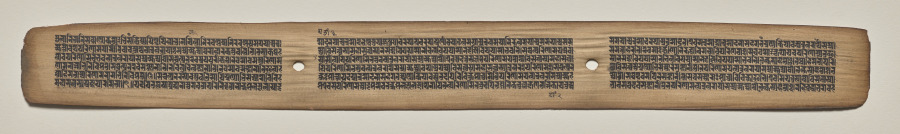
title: Text, folio 53 (recto), from a Manuscript of the Perfection of Wisdom in Eight Thousand Lines (Ashtasahasrika Prajnaparamita-sutra)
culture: Eastern India, Bihar, Vikramashila Monastery. Painting: Nepal, Kathmandu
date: Sunday, September 14, 1119 (year 239 of the Newar Samvat in the month of Ashvina)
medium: gum tempera and ink on palm leaves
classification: Painting